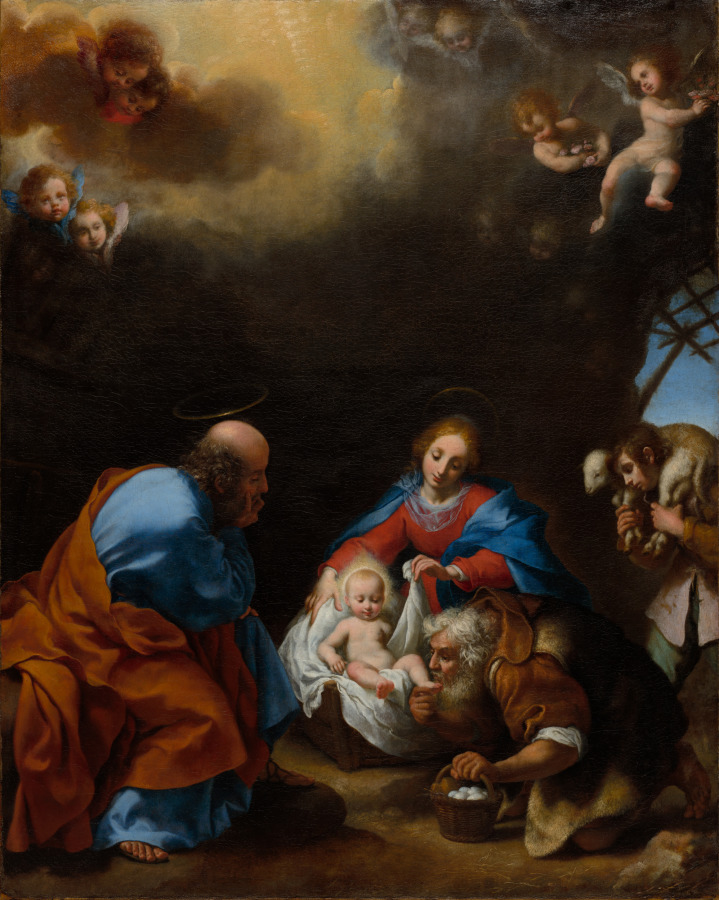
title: Adoration of the Shepherds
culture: Italy, 17th century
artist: Carlo Dolci (Italian, 1616–1687)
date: c. 1670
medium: oil on canvas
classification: Painting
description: The historical significance of the Baroque painter Carlo Dolci, a precocious artist whose skill was recognized early by the leading Florentine patrons of his time, is often diminished due to his traditionalist compositions. Having gained local reputation as a talented portraitist and painter of religious narrative, Dolci's anti-Mannerist technique dismissed many of the leading Baroque trends as superfluous, retaining an unobtrusive and placid style in the manner of those before him. Having been a devout follower of the brotherhood of St. Benedict, Dolci draws upon a strict Christian iconography in his depiction of the shepherds' witness account of the birth of Christ. --Charles Eppley (January 2009)